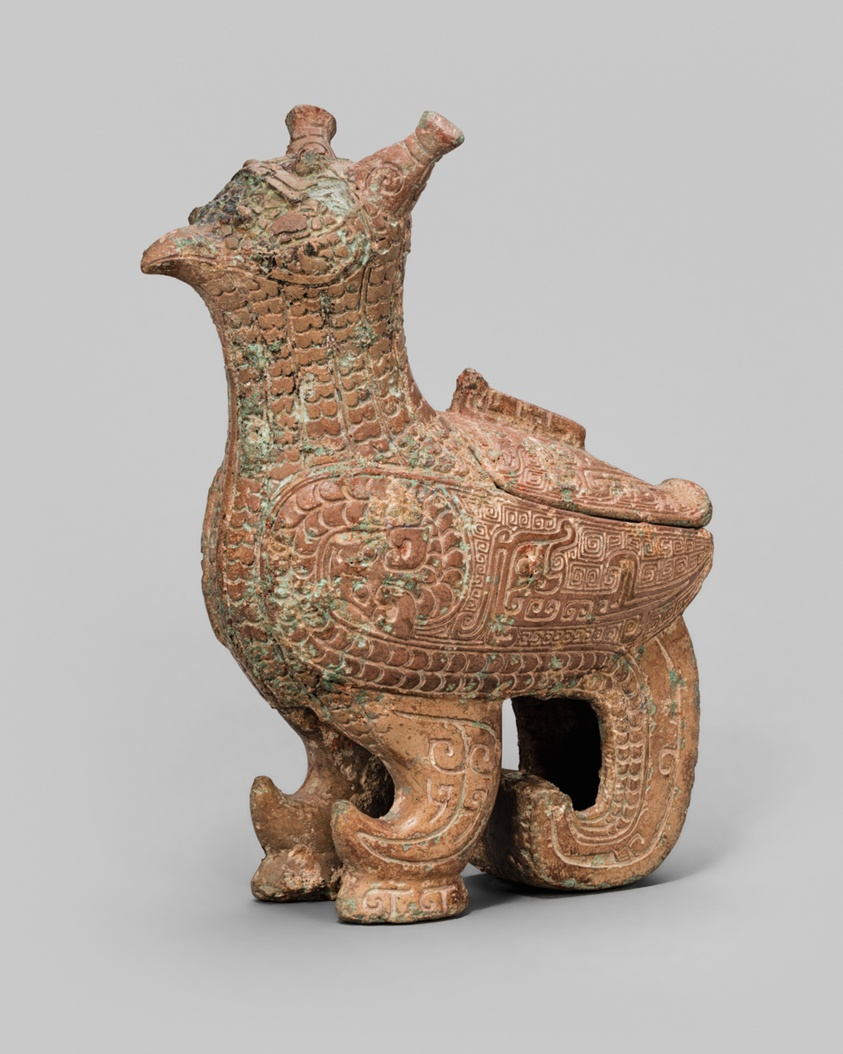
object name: Vessel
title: Bird-Shaped Container (zun)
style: Chinese (culture or style)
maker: China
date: Late Shang dynasty (13th century–1046 B.C.)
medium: Bronze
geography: China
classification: vessel; bronze; vessel for serving drinks; metal; asian art